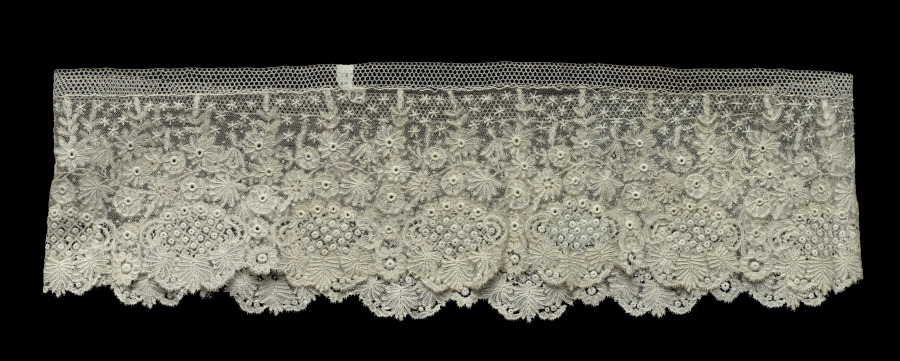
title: Lace Sleeve Flounce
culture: Belgium, Brussels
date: 1800s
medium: Needle and bobbin lace with embroidery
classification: Lace